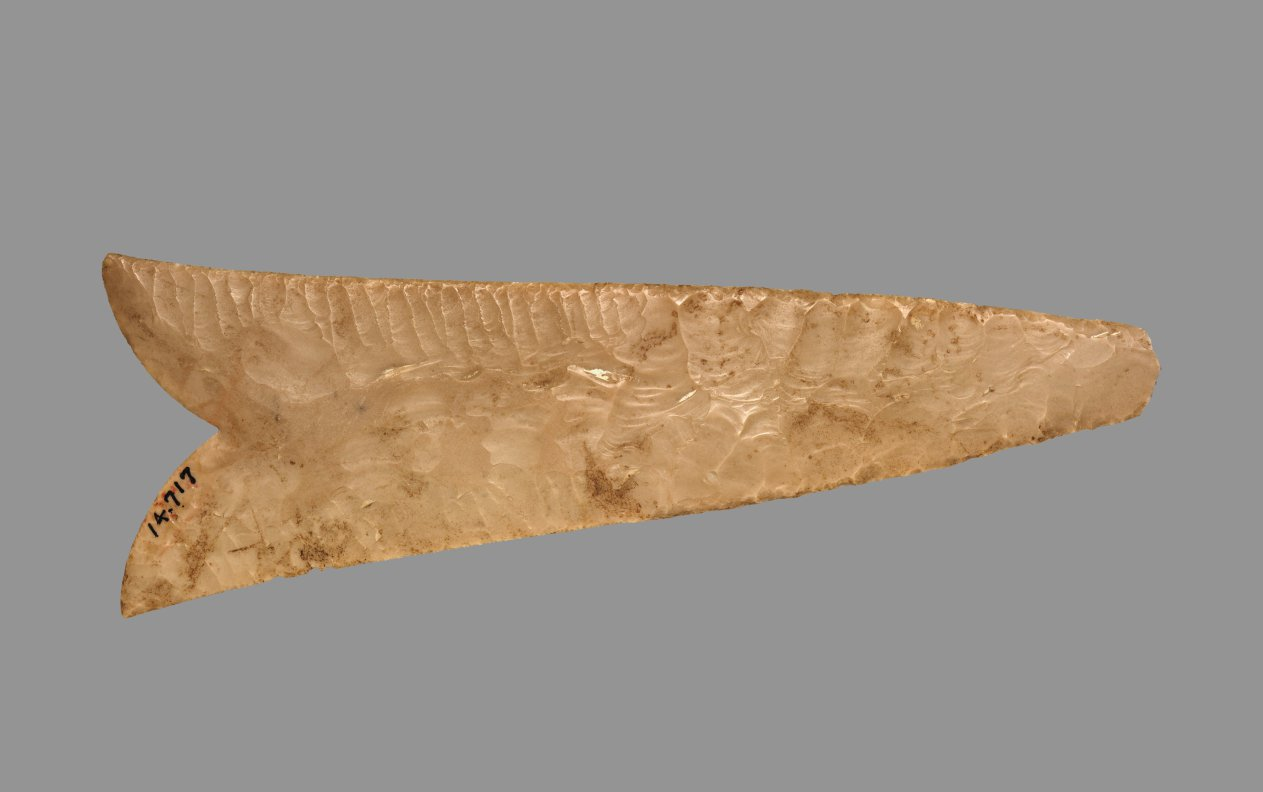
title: Fishtail Knife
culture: Egypt, Predynastic (5000–2950 BCE), Naqada II (3650–3300 BCE)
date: 4000–3000 BCE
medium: tan-colored flint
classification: Implements